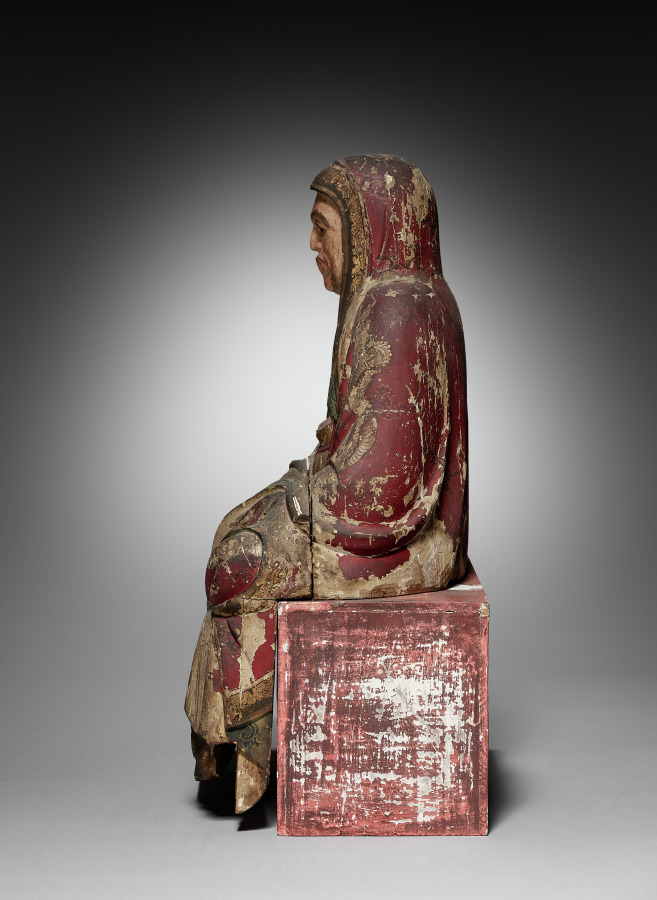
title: Rakan (Arhat) ?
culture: Japan, Edo period (1615–1868)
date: early to mid-1800s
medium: wood, gesso, pigment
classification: Wood